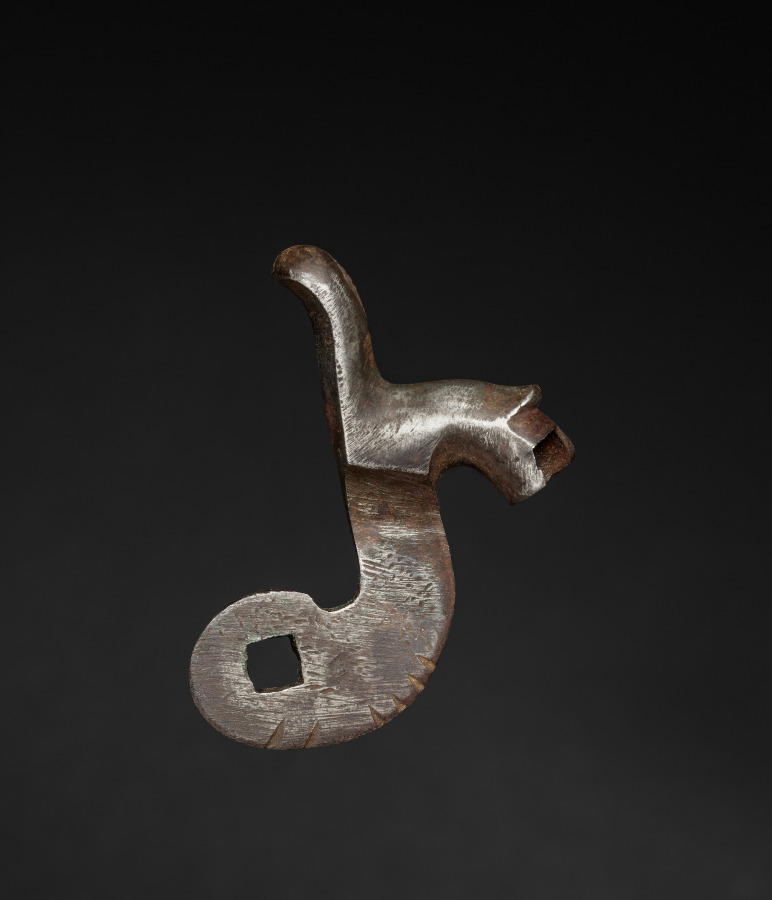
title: Gun-Lock Hammer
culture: England, early 19th century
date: c. 1800–1825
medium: steel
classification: Arms and Armor